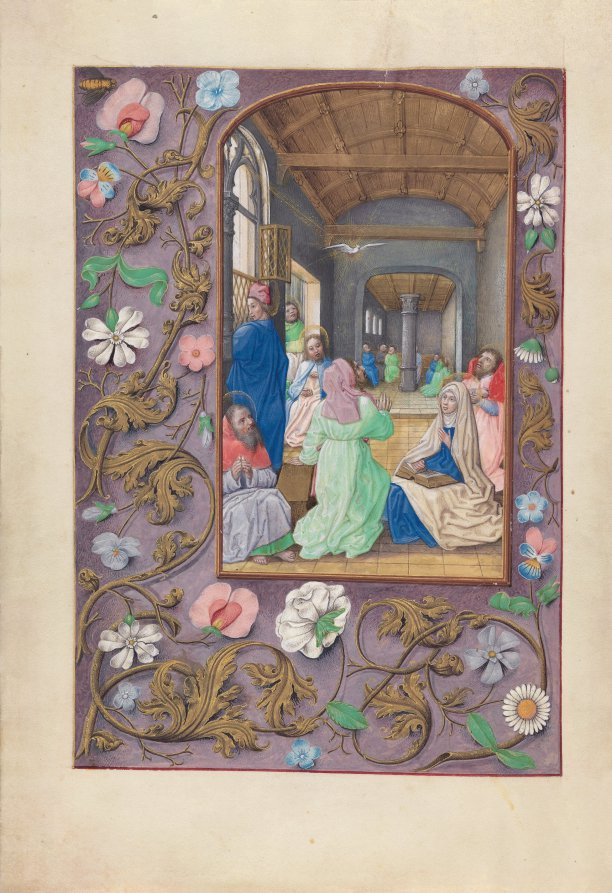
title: Hours of Queen Isabella the Catholic, Queen of Spain: Fol. 31v, Pentecost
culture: Flanders, Ghent and Bruges, late 15th century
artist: Master of the First Prayerbook of Maximillian (Flemish, c. 1444–1519)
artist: and Associates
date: c. 1500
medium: ink, tempera, and gold on vellum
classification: Bound Volume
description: A great lover of Flemish art, Queen Isabella treasured her many devotional books. This deluxe manuscript was created for her private devotions by highly organized and distinctly talented manuscript painters active in Ghent and Bruges. The Ghent-Bruges school represents the culmination of Flemish book painting, whose main features were the use of rich colors, illusionistic effects, a love of landscape, and a strong sense of visual narrative. Manuscripts produced by this circle of artists are renowned for their border decoration featuring a rich variety of realistically painted flowers, scrolling acanthus leaves, birds, and butterflies.